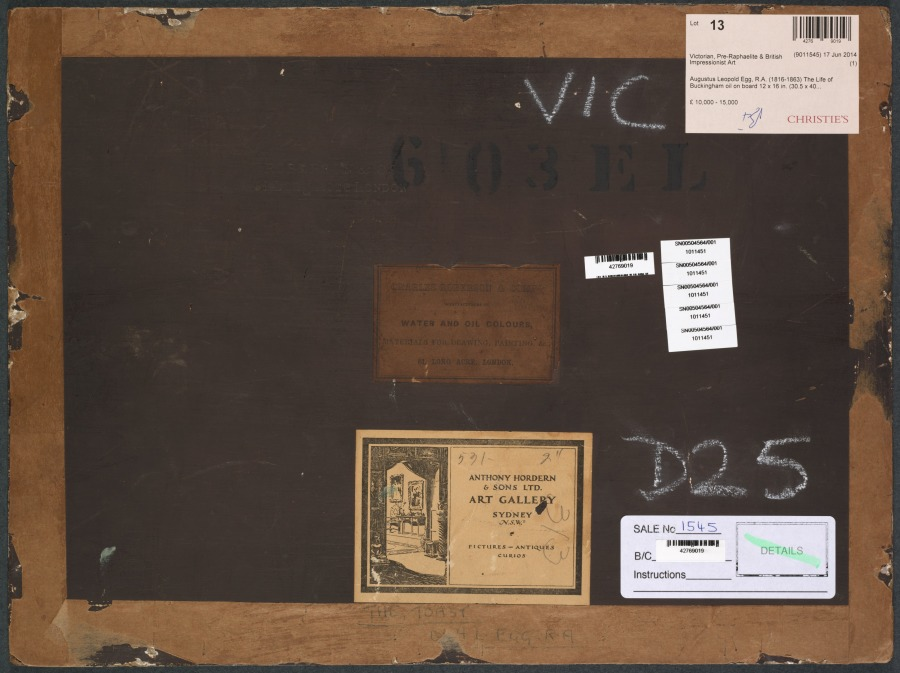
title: The Life of Buckingham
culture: England, 19th century, Victorian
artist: Augustus Leopold Egg (British, 1816-c. 1863)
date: c. 1855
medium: oil on board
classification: Painting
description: Augustus Leopold Egg’s The Life of Buckingham depicts a fictional moment in the debauched, roguish life of George Villiers (1628–1687), 2nd Duke of Buckingham (seated at the center, wearing white). Although the scene is invented, the merrymakers and courtesans depicted around the table (among them King Charles II, to Buckingham’s right) were characters the duke would have personally known and were familiar to Victorian audiences who delighted in the cautionary tale of excess.